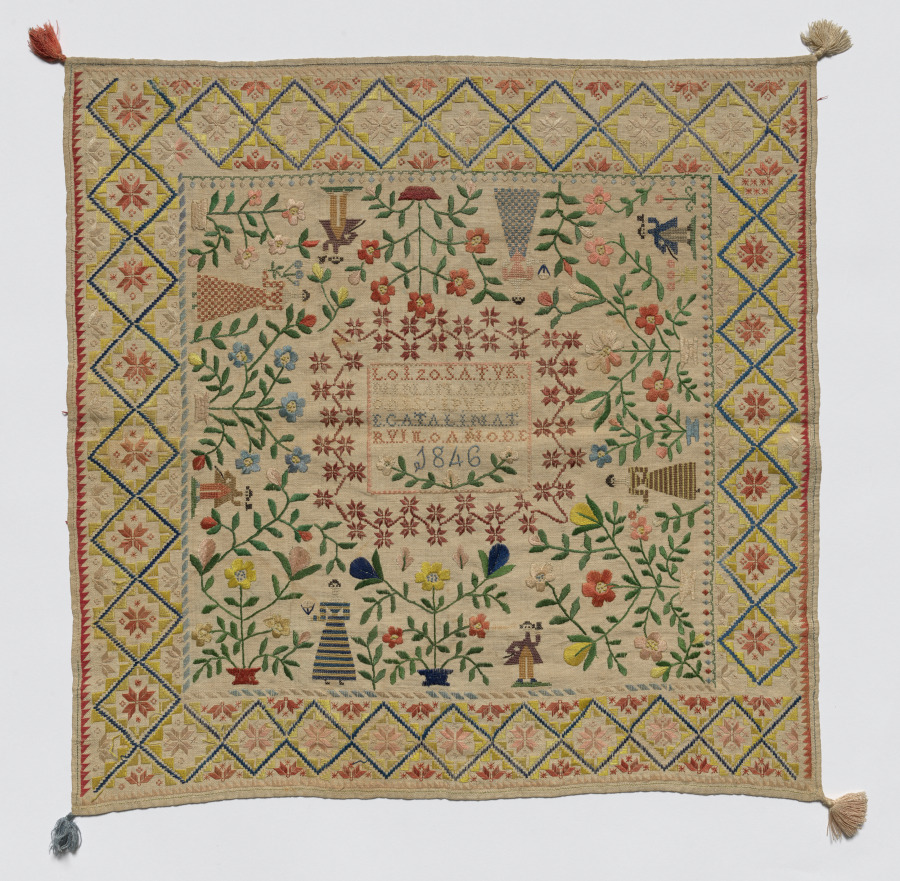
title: Sampler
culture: Spain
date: 1846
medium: embroidery; silk on linen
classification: Sampler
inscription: in square in center: "LO IZO SATVR/NINA MADVEÑ/O DISCIPVLA D/E CATALINA T/RVILLO AÑO DE/ 1846" (Saturnina Madueno made it, pupil of Catalina Tru-[j] illo in the year 1846).